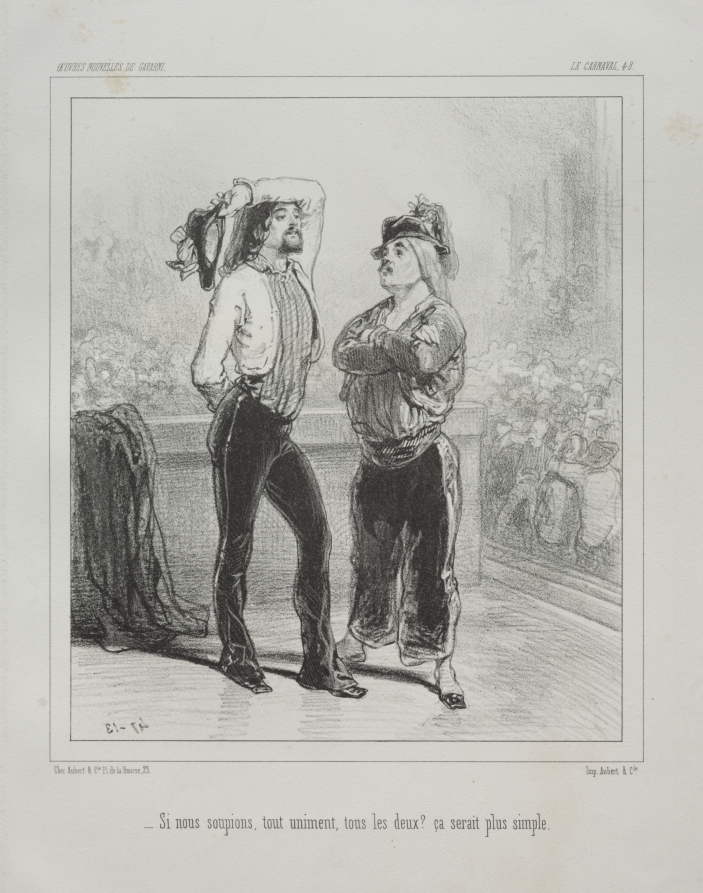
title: Carnaval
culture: France, 19th century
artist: Paul Gavarni (French, 1804–1866)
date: c. 1841–47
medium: lithograph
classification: Print